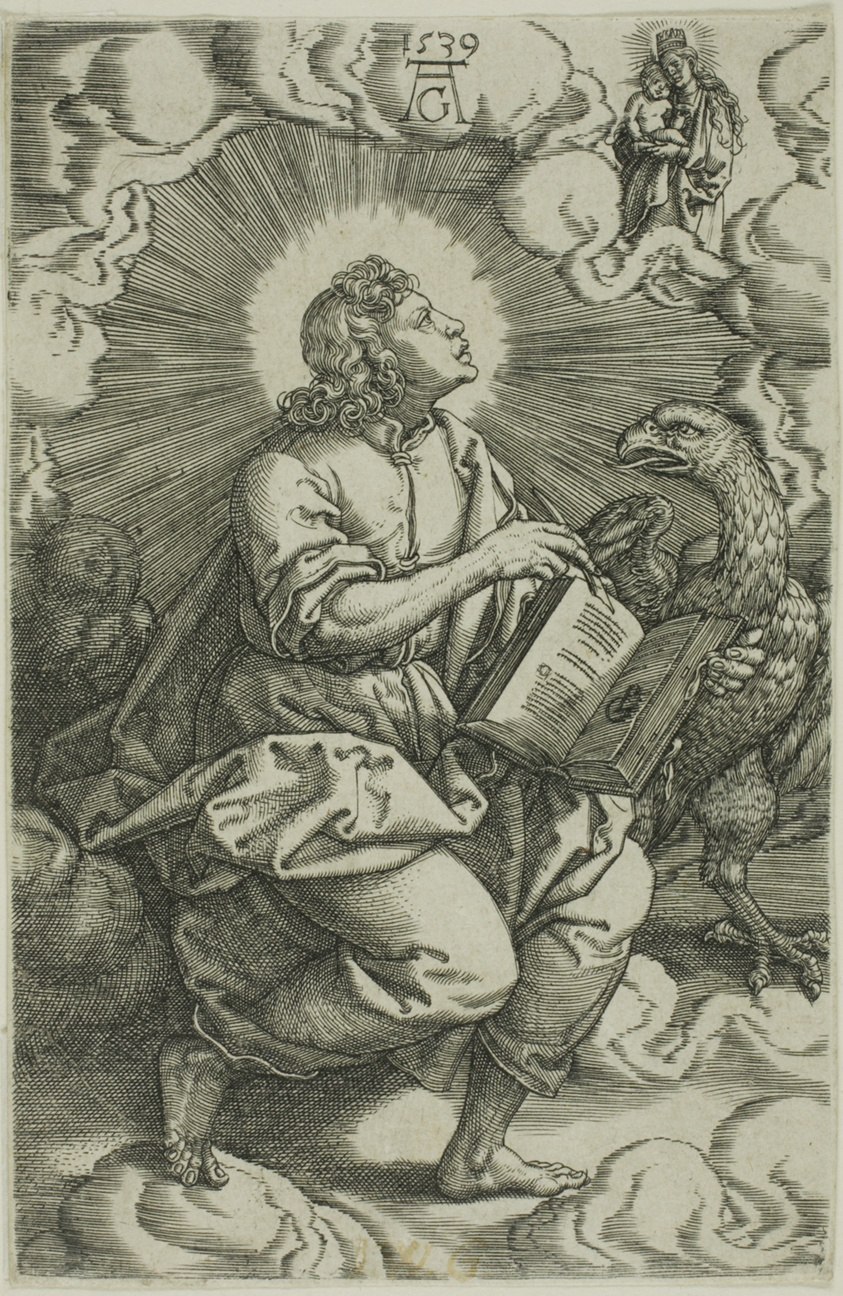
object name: Print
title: St. John, from The Four Evangelists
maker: Heinrich Aldegrever (German, 1502-c. 1560); after Georg Pencz (c. 1500-1550)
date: 1539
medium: Engraving in black on ivory laid paper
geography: Germany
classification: engraving; print; prints and drawing